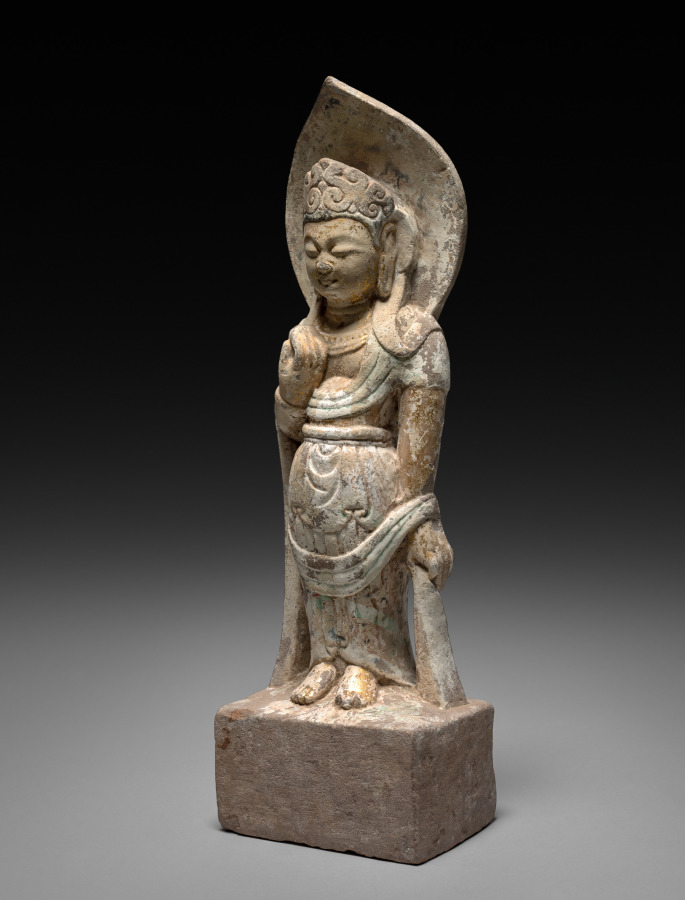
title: Bodhisattva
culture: China, Sui dynasty (581-618) - Tang dynasty (618-907)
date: late 500s–early 600s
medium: stone with polychromy and gilding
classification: Sculpture